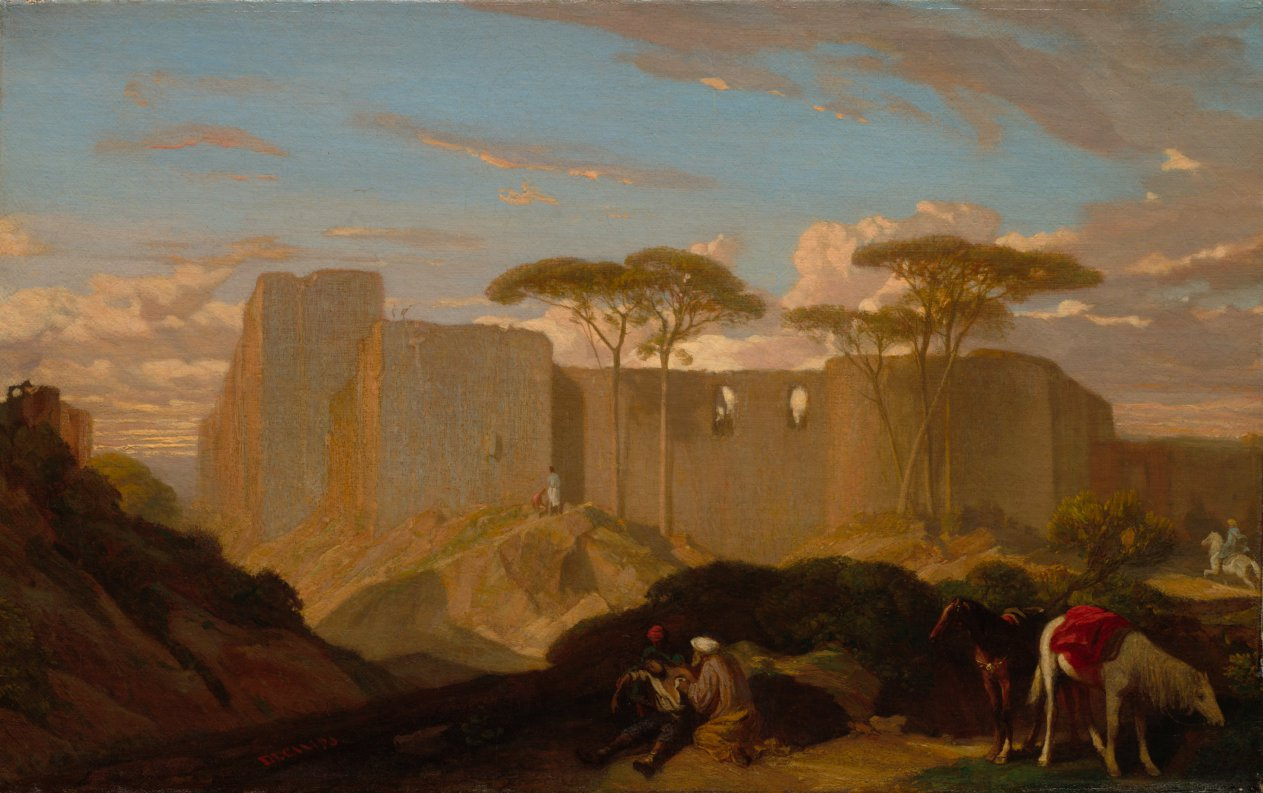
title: The Good Samaritan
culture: France, 19th century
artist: Alexandre-Gabriel Decamps (French, 1803–1860)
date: c. 1842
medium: oil on fabric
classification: Painting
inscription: Signed in lower left in red: decamps